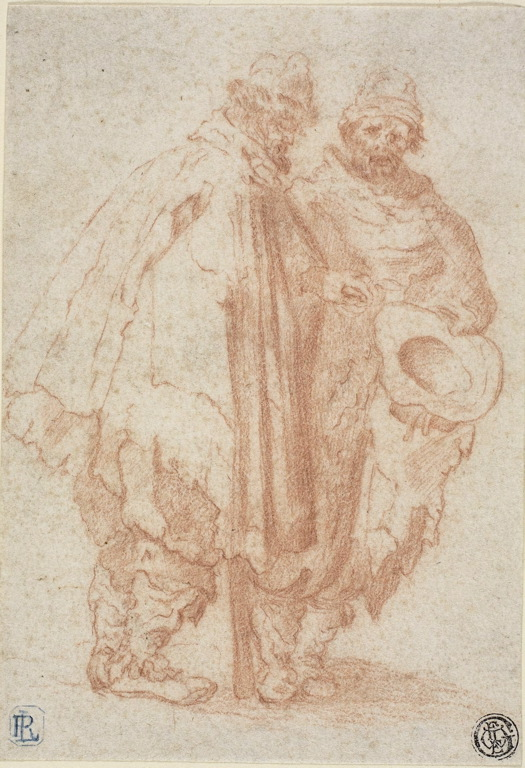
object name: Drawing and Watercolor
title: Two Bearded Men in Ragged Cloaks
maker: Style of Jacques Callot (French, 1592-1635)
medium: Red chalk on ivory laid paper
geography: France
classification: chalk; drawings (visual works); prints and drawing